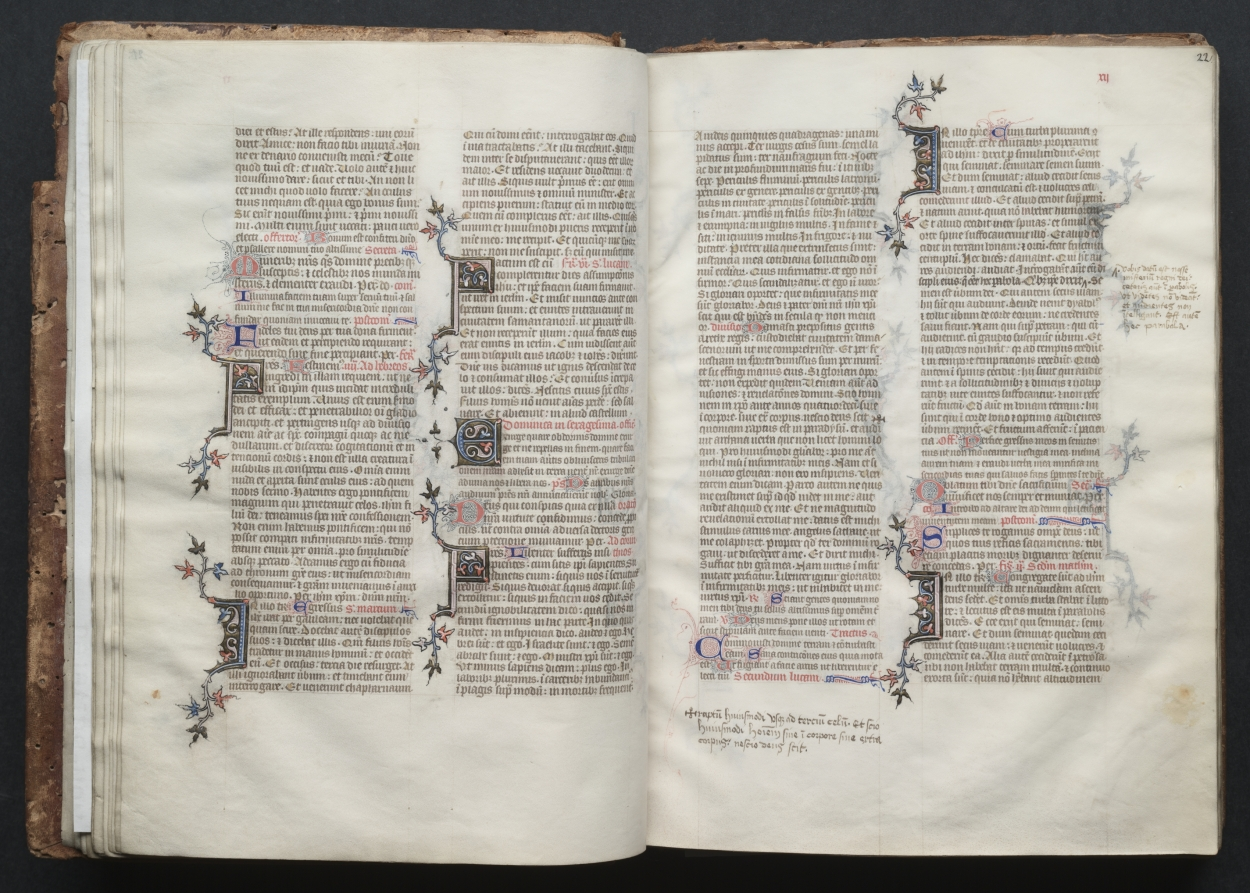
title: The Gotha Missal: Fol. 21v, Text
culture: France, Paris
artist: Master of the Boqueteaux (French)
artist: and Workshop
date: c. 1375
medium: ink, tempera, and gold on vellum; blind-tooled leather binding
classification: Bound Volume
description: The style and quality of this manuscript's decoration is typical of deluxe Parisian books made for aristocratic or royal patrons. Most of the book's decoration appears to be the work of the Master of the Boqueteaux, an artist active at the court of King Charles V (died 1380). His style was apparently shared by a number of book illuminators working in and around Paris. It is very possible that the Gotha Missal belonged to Charles V, but is not provable because the manuscript has no royal portraits and lacks a colophon. Given the book's magnificent decoration, however, it would seem that it was produced for a Valois prince, if not for the king himself. The manuscript receives its name from the German dukes of Gotha, its later owners.